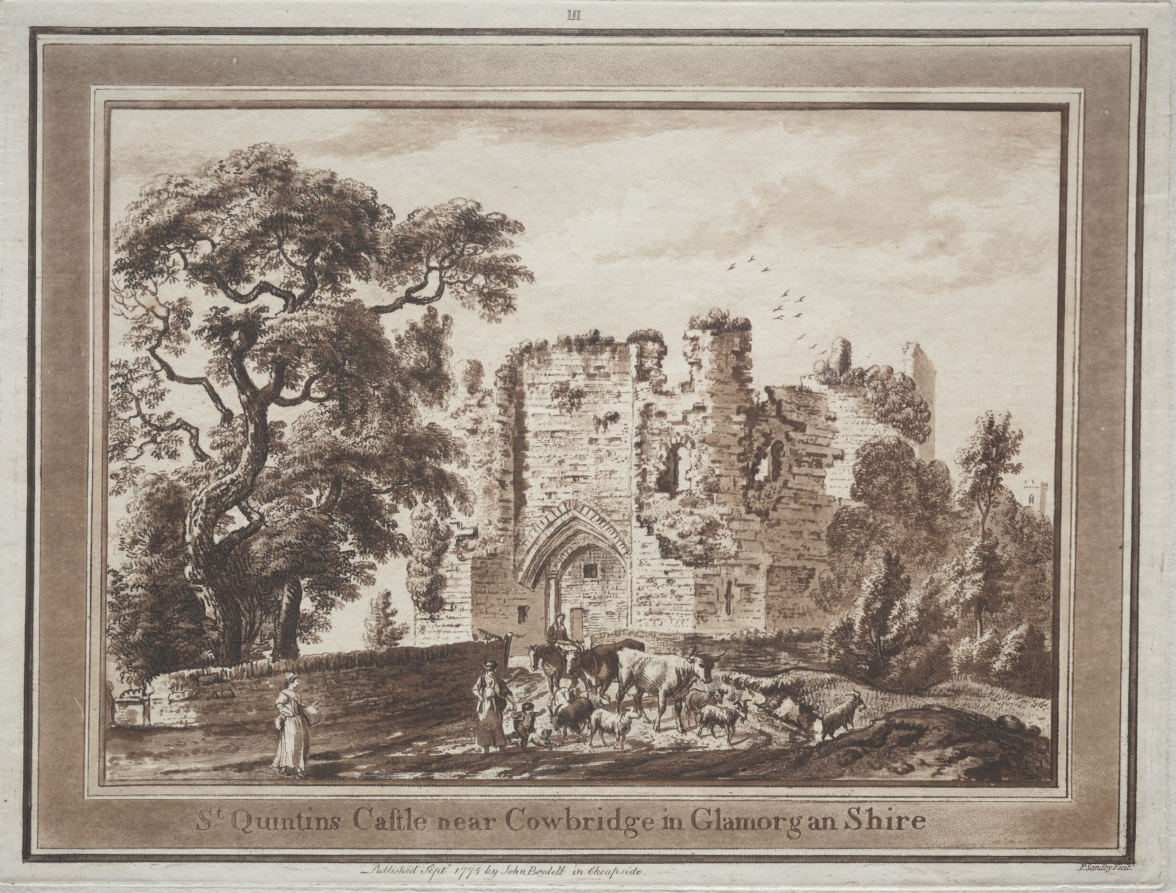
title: Twelve Views in South Wales: St. Quintin's Castle near Cowbridge in Glamorganshire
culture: England, 18th century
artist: Paul Sandby (British, 1731–1809)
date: 1775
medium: etching, roulette, soft-ground etching, and aquatint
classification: Print